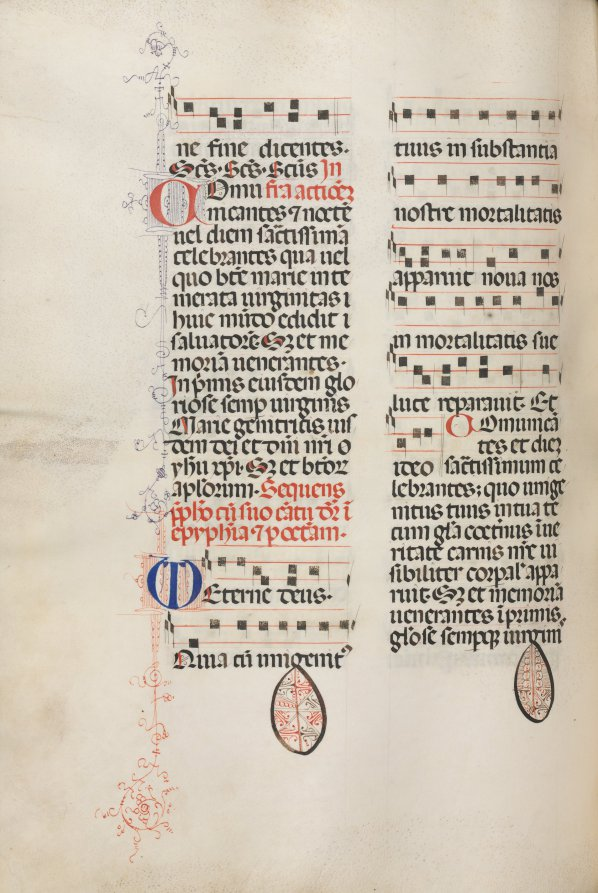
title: Missale: Fol. 177v: Music for various ordinary prayers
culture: Italy, Perugia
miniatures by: Bartolommeo Caporali (Italian, c. 1420–1503)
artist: assisted by Giapeco Caporali (Italian, d. 1478)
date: 1469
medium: ink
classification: Bound Volume